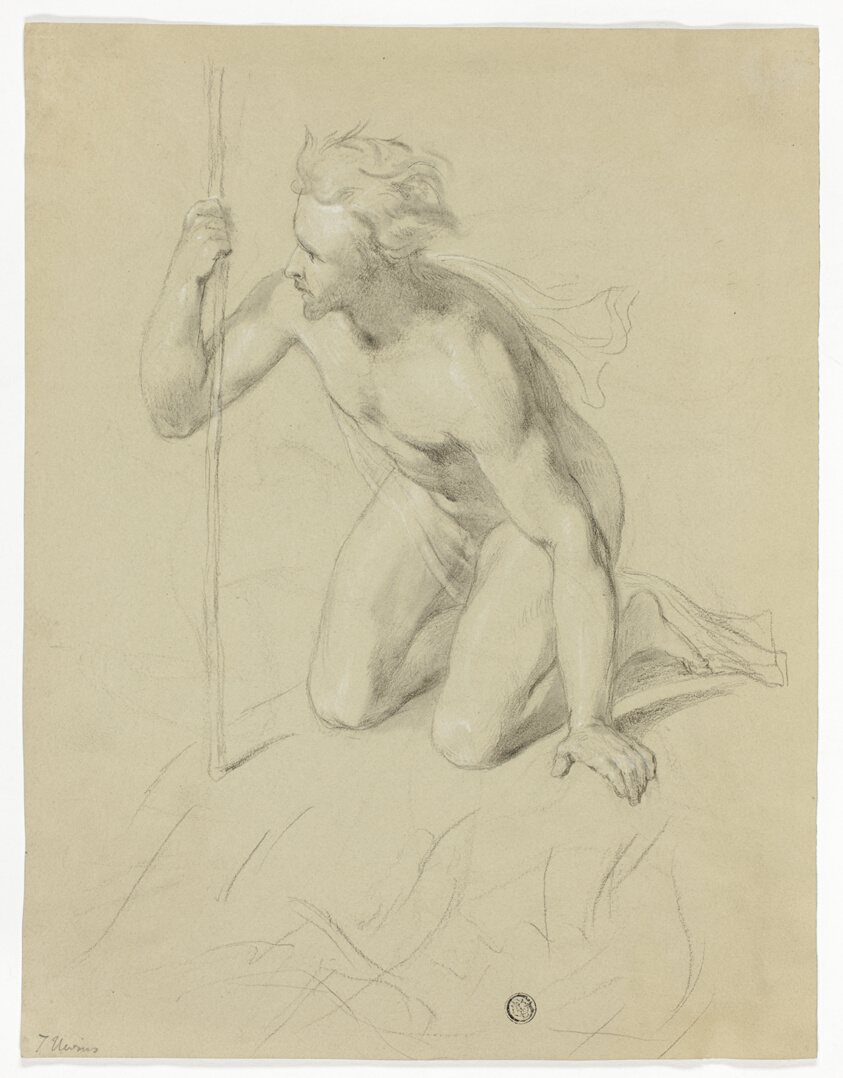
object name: Drawing and Watercolor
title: Nude Man Kneeling, Holding Staff (recto); Alpine Panorama (verso)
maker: Thomas Uwins (English, 1782-1857)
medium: Black chalk, heightened with white chalk (recto and verso), on gray-brown wove paper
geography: England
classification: chalk; paper; drawings (visual works); prints and drawing